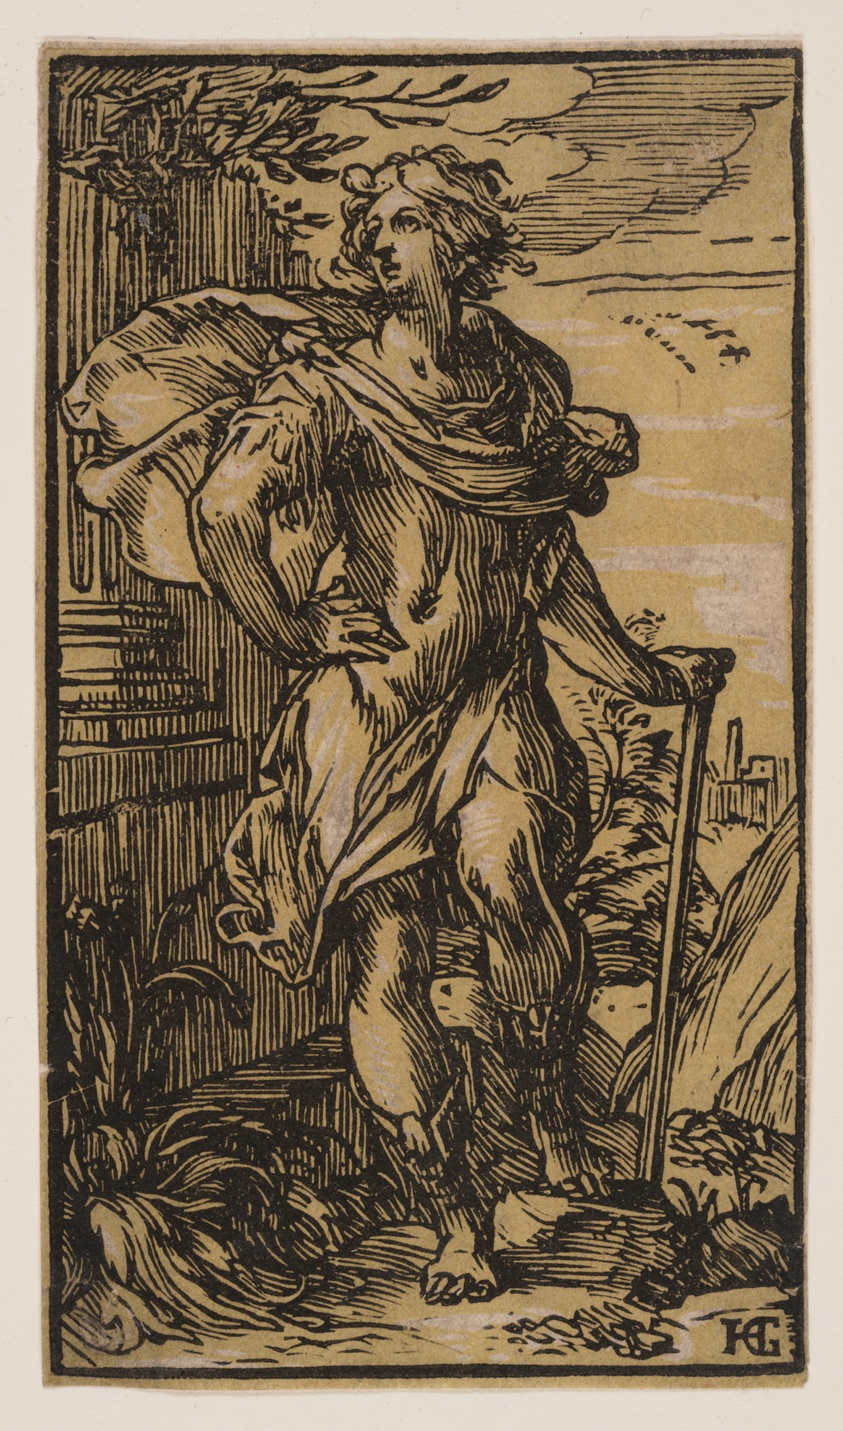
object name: Print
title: Standing Young Man with a Cane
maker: Hendrick Goltzius (Dutch, 1558–1617)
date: c. 1596-1600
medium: Chiaroscuro woodcut printed from two blocks in yellow on ivory laid paper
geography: Netherlands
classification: woodcut; paper; print; prints and drawing